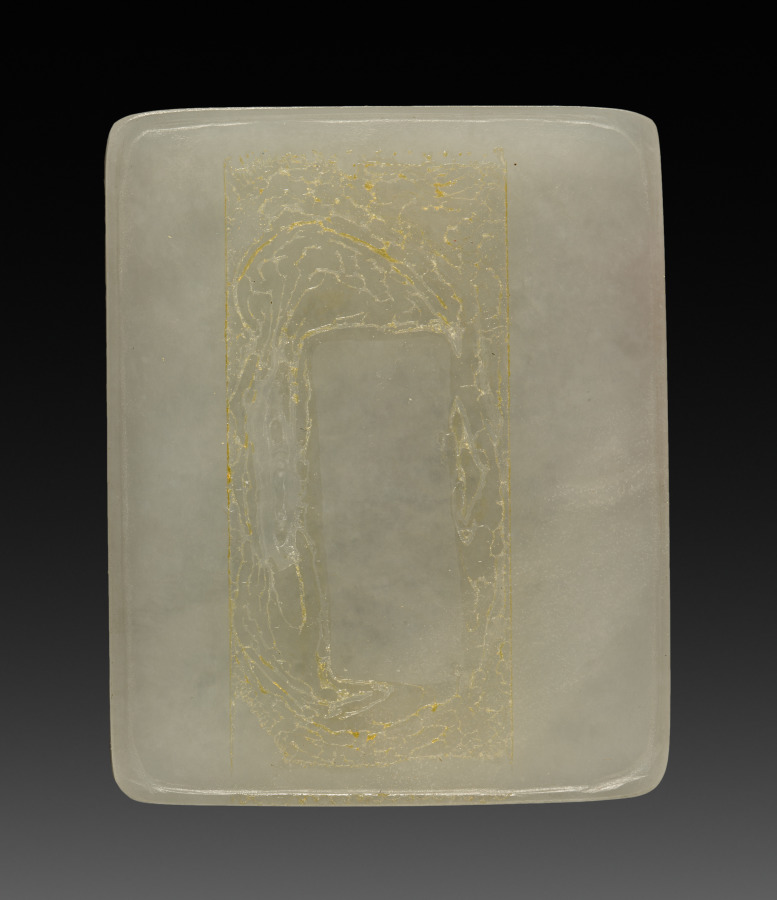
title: Seal Box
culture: China, Qing dynasty (1644-1911)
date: 1644–1700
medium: jade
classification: Jade